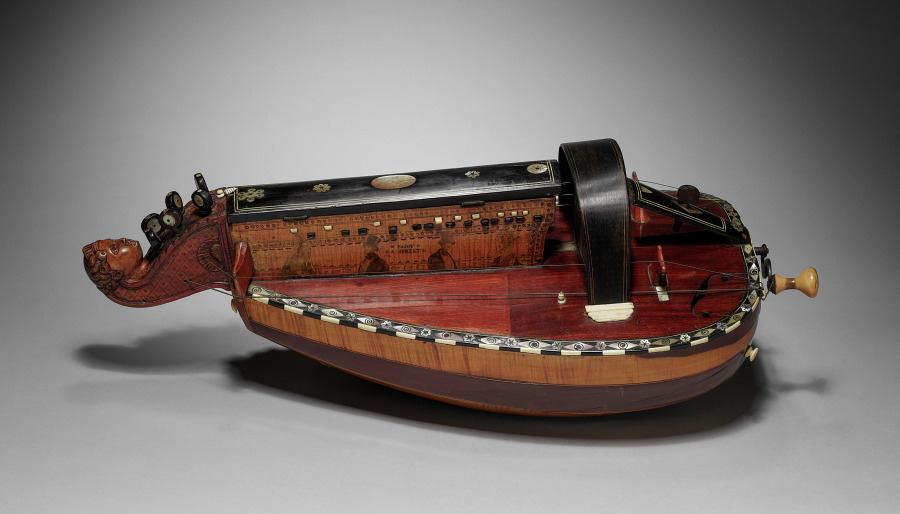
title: Vielle à roue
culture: France, 18th century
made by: Pajot of Jánzat (French)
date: 1700s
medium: wood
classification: Musical Instrument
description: The instrumentalist could play melodies on the keyboard that presses tangents against one or more strings. Often there are also multiple drone strings, which give a constant pitch accompaniment to the melody, resulting in a sound similar to that of bagpipes. This type of instrument is depicted in several artworks in the CMA collection: 1924.656, 2008.34.2, 1960.20. The vielle à roue is also related to the Swedish nyckelharpa, which was featured on the CMA performing arts series in 2017 played by Emilia Amper.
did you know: Also known as a “hurdy-gurdy” or “wheel fiddle,” this instrument produces sound by a hand crank-turned rosined wheel rubbing against the strings.